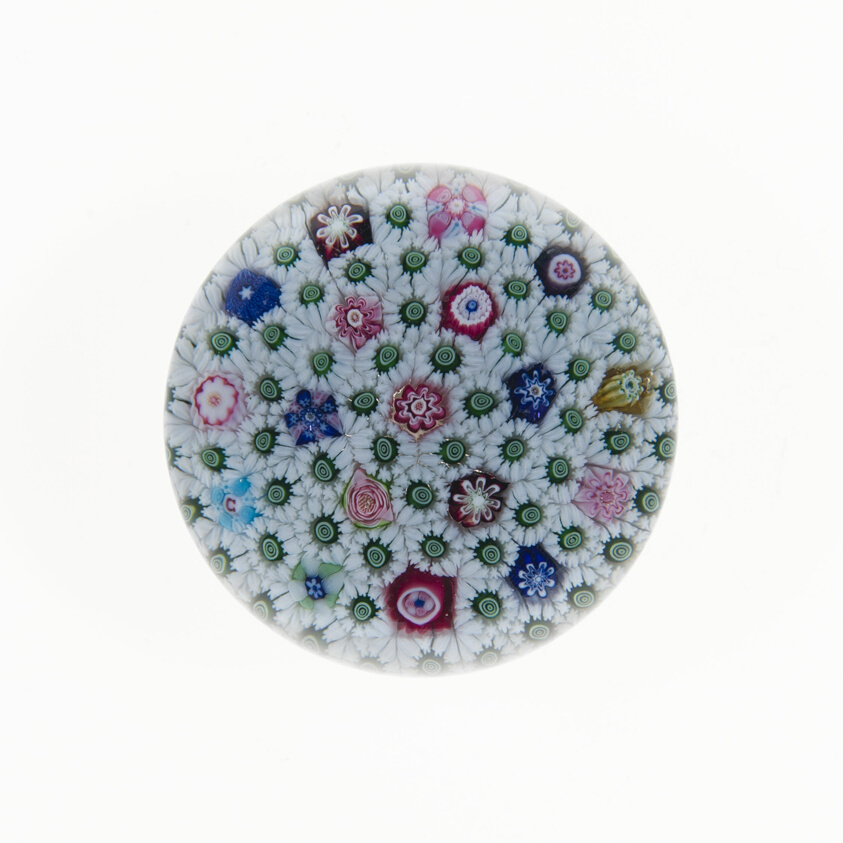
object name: Glass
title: Paperweight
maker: Clichy Glassworks (Cristalleries de Clichy); Clichy, France, 1837-1885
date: c. 1845/60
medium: Glass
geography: France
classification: paperweight; glass